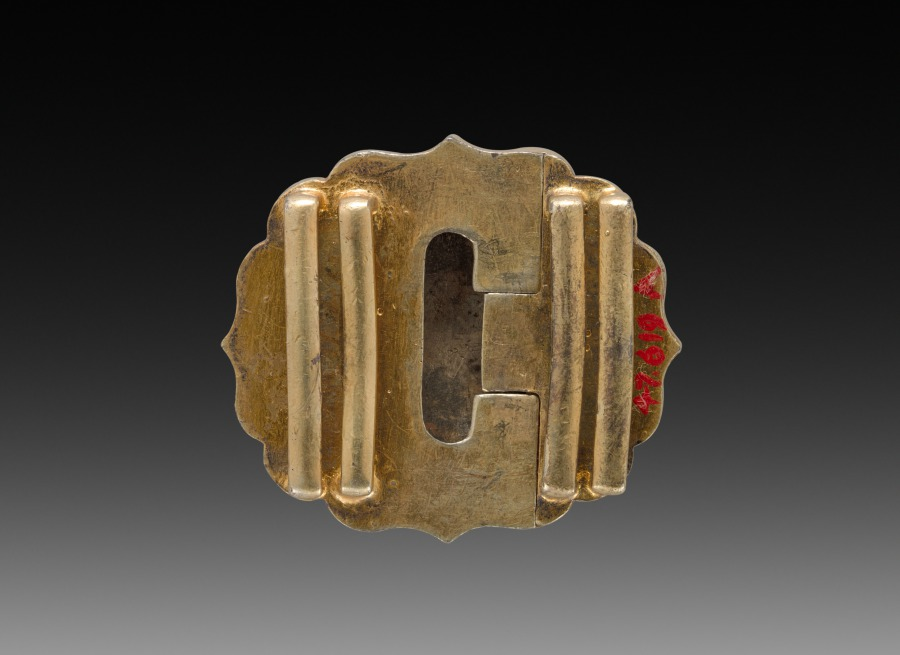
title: Buckle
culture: China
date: 1900s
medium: silver gilt with filigree work, set with rose quartz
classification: Jewelry